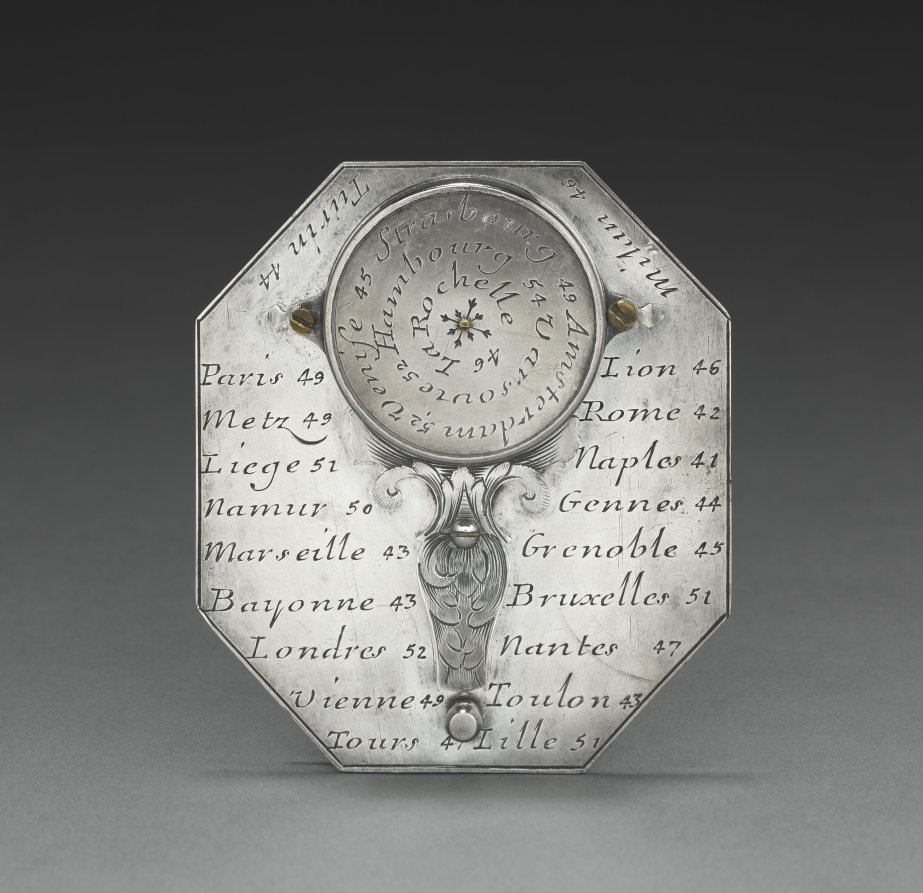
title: Butterfield Sundial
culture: France, 18th century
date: 1700s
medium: silver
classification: Silver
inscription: [Engraved signature above the compass in ribbon band]: "N. BION A Paris"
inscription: [Engraved on the face of the sundial]: “Pour 55° 4-5-6-7-8-9-10-11 50° IIII-V-VI-VII-VIII-IX-X-XI 45° 5-6-7-8-9-10-11 40° -VI-VII-VIII-IX-X-XI'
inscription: [Engraved on the other side]: "Pour 55° -8-7-6-5-4-3-2-1-0 50°-VIII-VII-VI-V-IIII-III-II-I 45°-8-7-6-5-4-3-2-1 40°-VII-VI-V-IIII-III-II-I"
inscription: [Engraved around the compass]: “NORD-OUEST-SUD-EST”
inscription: [Engraved on the back of the sundial]: “Turin 44 Milan 46 Paris 49 Lion 46 Metz 49 Rome 42 Liege 51 Naples 44 Namur 50 Gennes 44 Marseille 43 Grenoble 45 Bayonne 43 Bruxelle 51 Londres 52 Nantes 47 Vienne 48 Toulon 43 Tours 47 Lille 51”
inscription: [Engraved around the back of the compass]: “Venise 45 Strasbourg 49 Amsterdam 52 Hambourg 54 Varsovie 52 La Rochelle 46”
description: Butterfield-type sundials are characterized by their adjustable gnomons, metal flaps that cast a shadow on the dial’s face to indicate the hour, and geographical indices. This sundial has a scale adjustable between latitudes of 40° to 60° north. The latitudes of 26 European towns are engraved on its back for quick reference. With an intricately engraved silver face, it would have functioned as a fashionable traveler’s accessory.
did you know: Butterfield-style sundials were named after Micheal Butterfield, an English scientific and mathematical instrument maker who worked in Paris between 1674 and 1724.